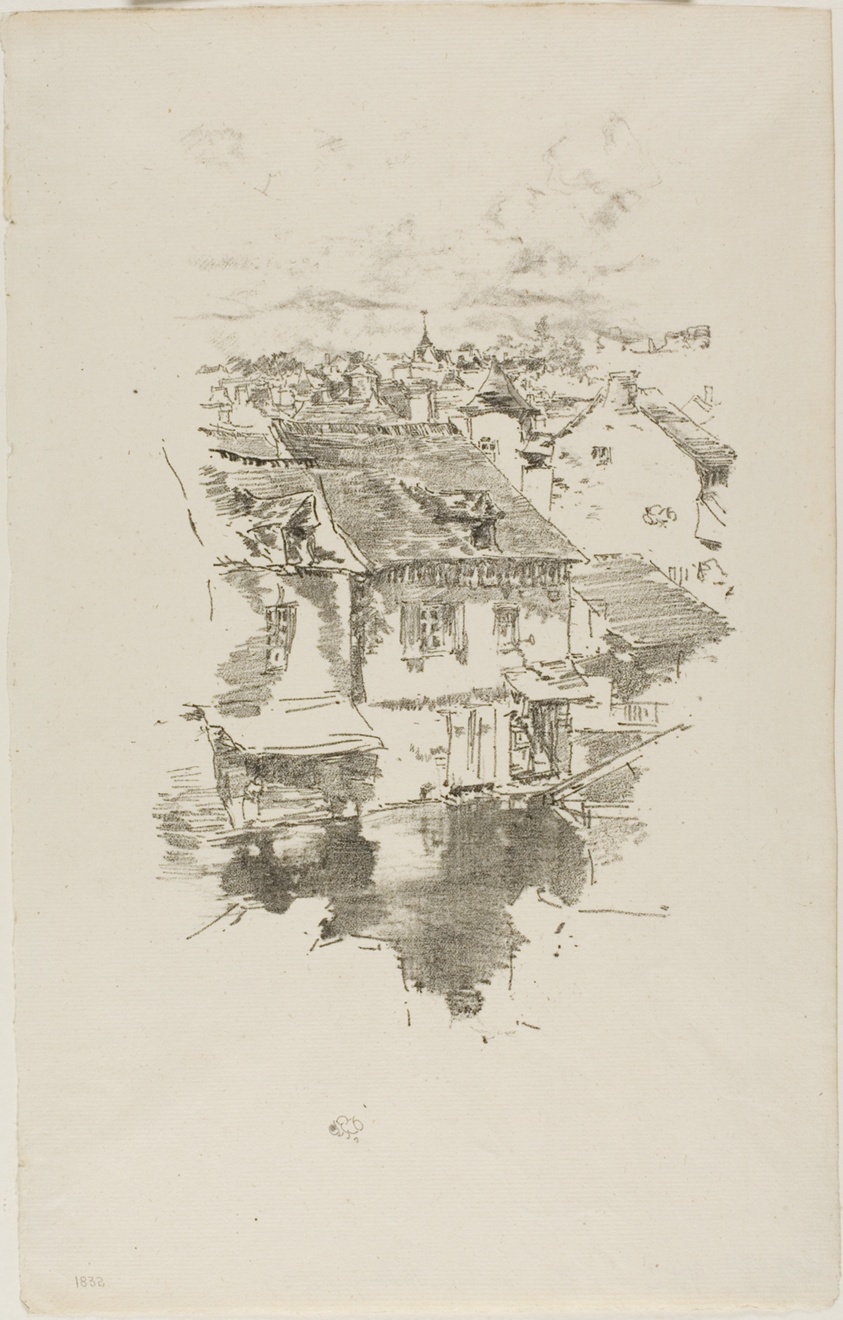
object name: Print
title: Vitré: The Canal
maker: James McNeill Whistler (American, 1834-1903)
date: 1893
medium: Transfer lithograph in black with stumping, on cream laid paper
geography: United States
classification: transfer lithograph; lithograph; print; prints and drawing; paper